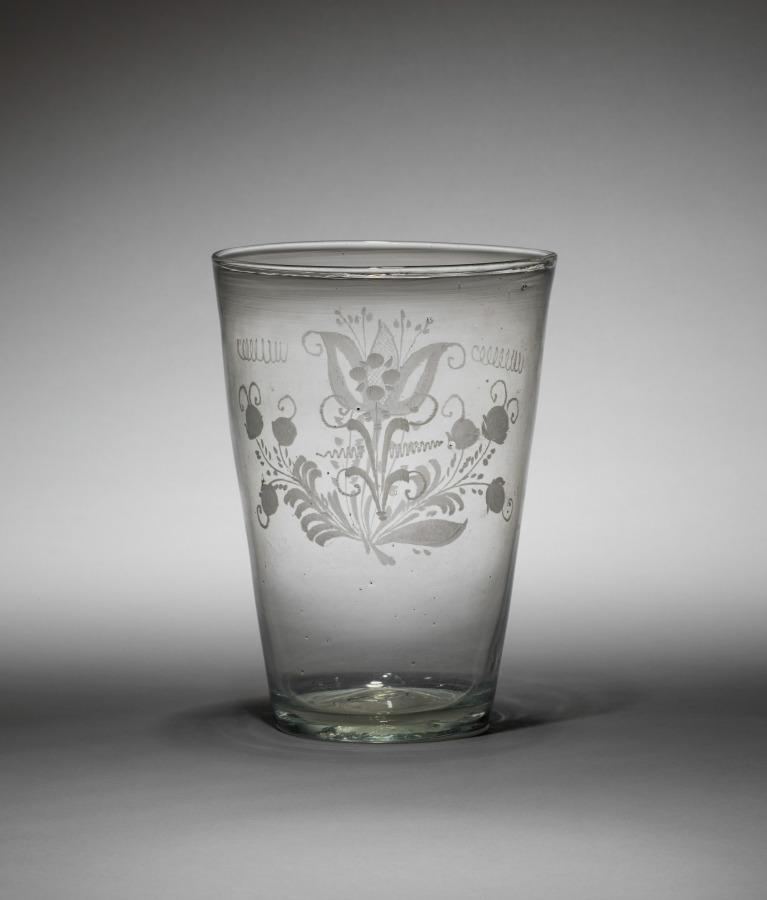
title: Flip Glass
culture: America, late 18th century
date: late 1700s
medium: glass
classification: Glass